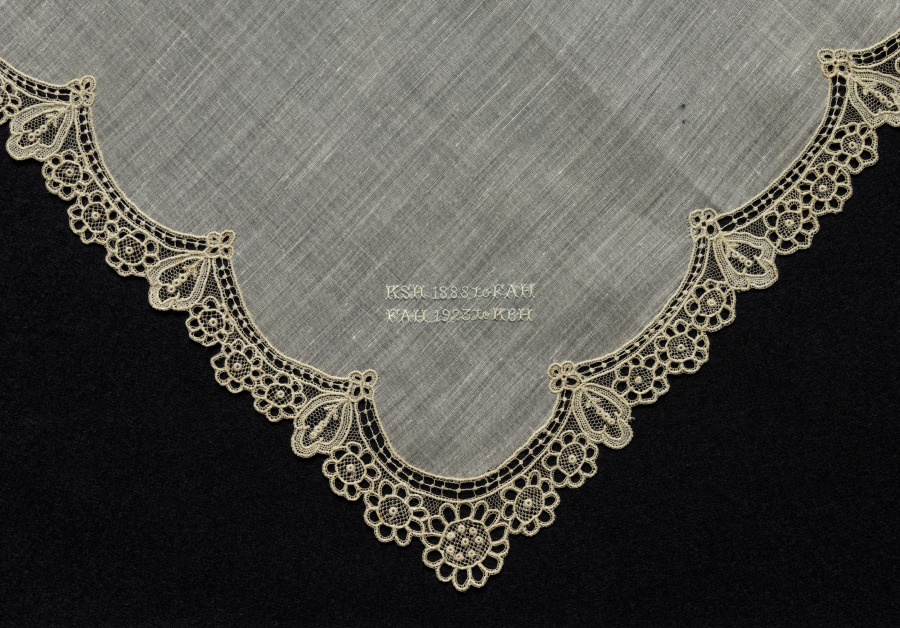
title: Lace Handkerchief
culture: Belgium, Brussels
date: 1860–99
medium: Plain weave linen center; needle lace (point de gaze) edging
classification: Lace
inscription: embroidered inscription in one corner: "K- S- H 1888 to F. A. H., F. A. H. - 1923 to K. B. H."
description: This Point de Gaze lace handkerchief is embroidered with an inscription in one corner: K- S- H 1888 t F. A. H. 1923 to K. B. H.